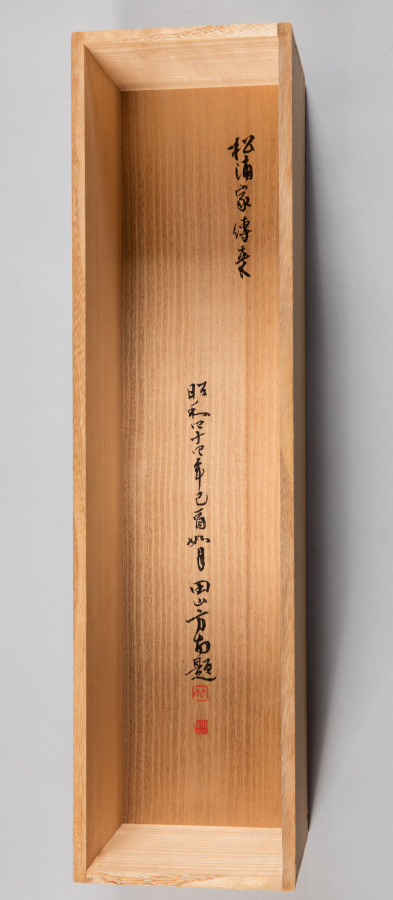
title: Reeds and Geese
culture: Japan, Kamakura period (1185–1333)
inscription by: Yishan Yining [Issan Ichinei] (Chinese, 1247–1317)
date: 1314–17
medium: hanging scroll; ink on paper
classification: Painting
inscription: signed: Issan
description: Reeds and geese has been a common pairing in Chinese literary and visual culture for many centuries. This painting presents the contribution of a Japanese amateur painter, almost certainly a Zen Buddhist monk, to Japan’s fledgling efforts to add the theme to its own cultural vocabulary in the early 1300s. As was customary at the time in Japan, the painter did not sign or seal his work; the inscription, a poem added to the painting by the eminent émigré monk Yishan Yining, along with his signature and seal, was of far greater cultural value. Today, the modestly sized painting has tremendous significance as one of the earliest surviving examples of Japanese ink paintings with reeds and geese.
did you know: Tokyo National Museum owns a copy of this painting made by Kano Gyokusen (1796–1864) when he was 14 years old.